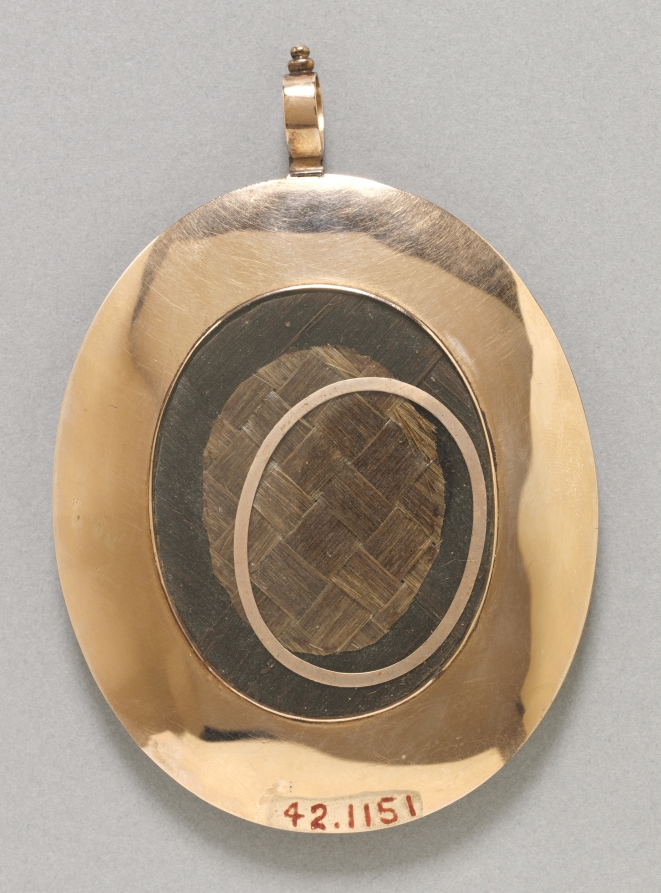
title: Portrait of Susan Coren Towers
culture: America, late 18th Century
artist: James Peale (American, 1749–1831)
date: 1796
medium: watercolor on ivory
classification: Portrait Miniature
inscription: signed lower left: I P / 1796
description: Susan Coren Towers was the daughter of a major in the Revolutionary War, and her husband was a successful woolen goods manufacturer. While little is known about Towers outside of her husband’s and father’s pursuits, Peale painted her with slightly asymmetrical clothing, bouncy curls, and a slight smirk, possible hints at her personality. While many portrait miniatures have compartments containing the sitter’s hair, this example holds hair from two individuals, likely Towers and a loved one.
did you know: Online fans of the Broadway musical Hamilton have frequently misidentified this image as a portrait of Peggy Schuyler, Alexander Hamilton’s sister-in-law.